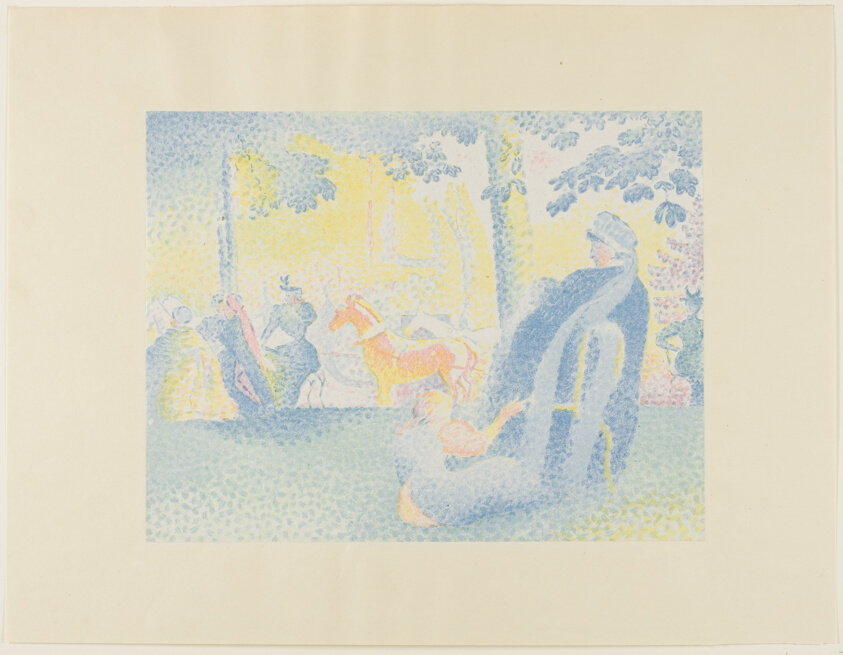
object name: Print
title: Les Champs Élysées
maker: Henri Edmond Cross (French, 1856-1910)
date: c. 1898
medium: Color lithograph on white Japanese paper laid down on ivory imitation Japanese paper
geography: France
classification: lithograph; print; prints and drawing